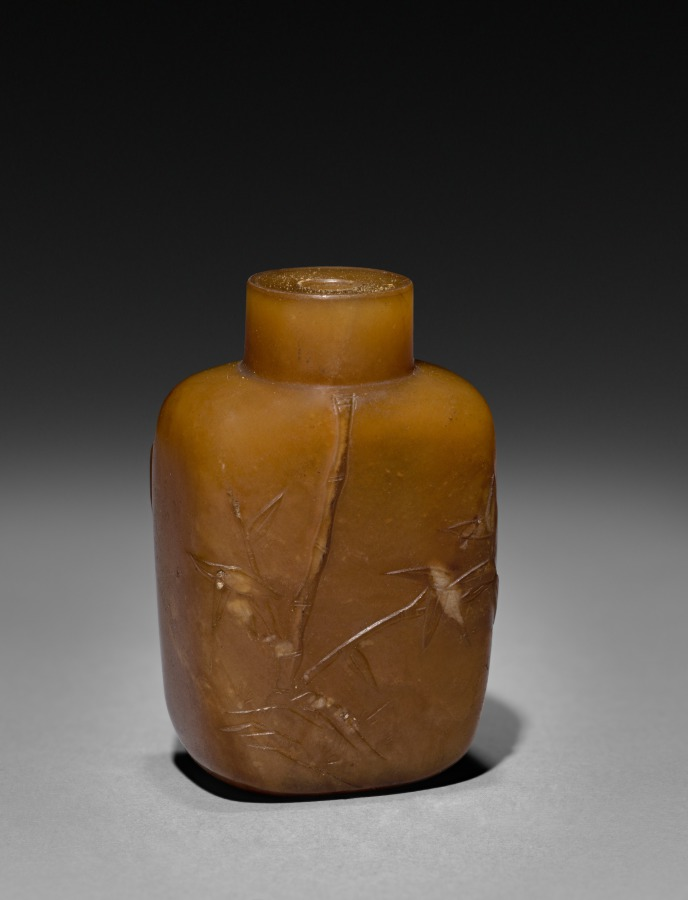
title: Snuff Bottle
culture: China, Qing dynasty (1644-1911)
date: 1644–1911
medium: glass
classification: Glass